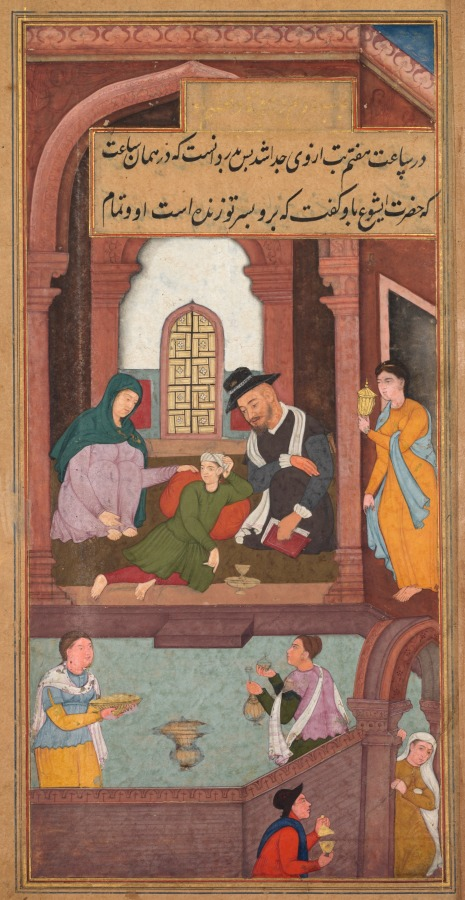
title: Jesus Heals the Nobleman’s Son in Capernaum (folio 70 recto), from a Mirror of Holiness (Mir’at al-quds) of Father Jerome Xavier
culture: Mughal India, Allahabad, made for Prince Salim (1569–1627)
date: 1602–4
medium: Gum tempera, ink, color, and gold on paper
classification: Manuscript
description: The diminutive figure wearing green in the center of the composition is the young son of a nobleman who was dying. Jesus healed him from afar so quickly that the subsidiary figures at the periphery of the scene are still anxious and bringing pots of remedies. This painting is unfinished; the border of the carpet and the geometric tile patterns on the floor of the forecourt have not been painted. An unknown number of artists with different backgrounds, skills, and experience contributed to this project, and even this work appears to be by at least two different hands.